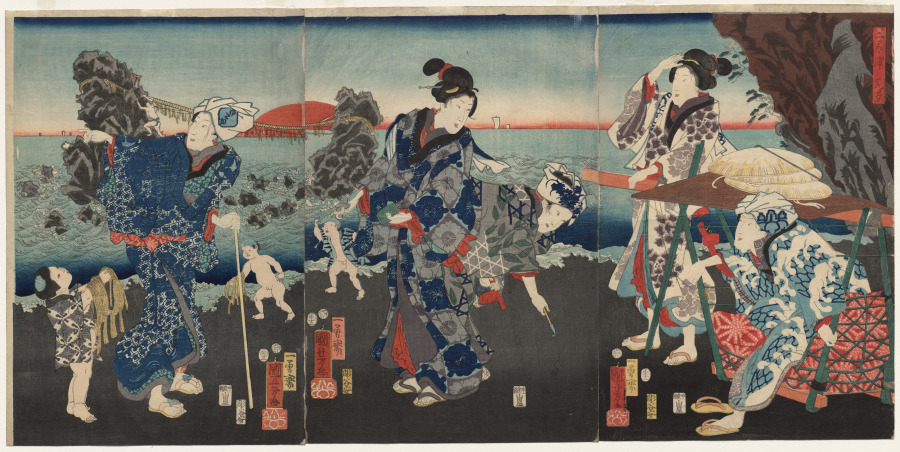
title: Splendid View at Futamigaura Bay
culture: Japan, Edo period (1615–1868)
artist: Utagawa Kuniyoshi (Japanese, 1797–1861)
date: 1854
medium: Triptych of color woodblock prints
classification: Print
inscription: Artist's signature: Ichiyūsai Kuniyoshi ga. Artist's seal: Paulownia.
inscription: Publisher: Yamadaya Shōhei (Nakabashi, emblem). Censorship seal: aratame.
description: These three prints form a continuous scene of figures visiting Futamigaura Bay near Ise Grand Shrine, one of Japan’s most sacred places. In the background, the sun rises between the “Wedded Rocks” joined by a twisted rope, called a shimenawa, used to designate a sanctified space. The rocks mark the entrance to Futami Okitama Shrine and are said to be embodiments of Izanagi and Izanami, the gods who, according to myth, created Japan. Futamigaura was a place where pilgrims purified themselves before visiting Ise and often lodged afterwards.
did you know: The woman at the left has the word Yutaka, one of the artist's seals, on her scarf.